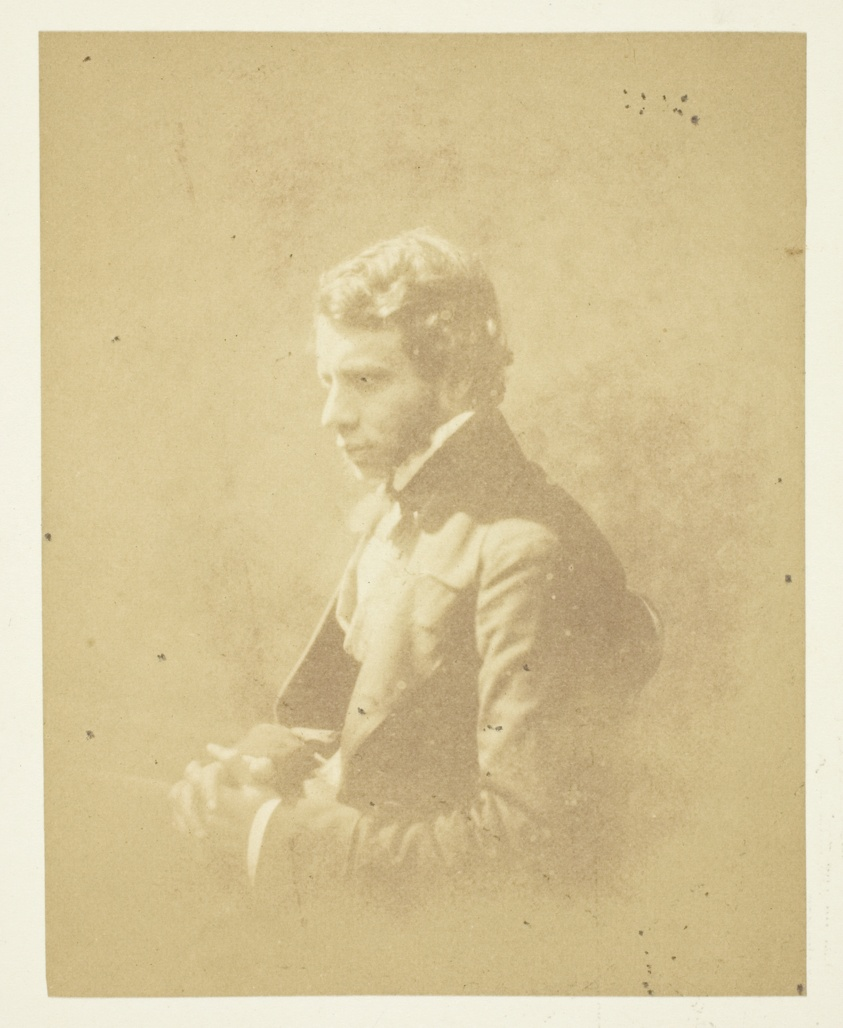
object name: Photograph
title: Untitled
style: 19th century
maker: Attibuted to David Octavius Hill; Scottish, 1802–1870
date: n.d. (c. 1850/70)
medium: Salted paper print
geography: Scotland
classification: salted paper print; photographic process; photography; photograph